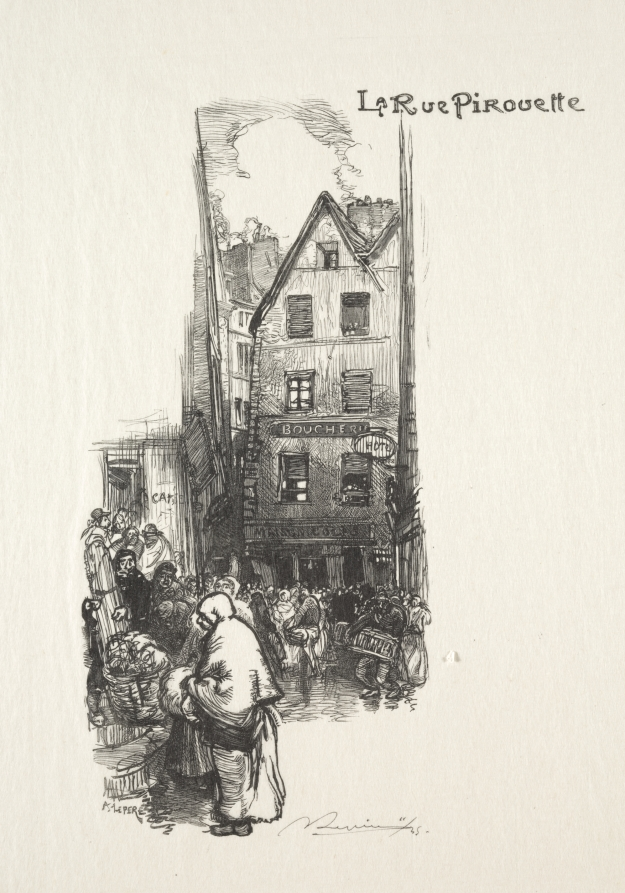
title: La Rue Pirouette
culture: France, 19th-20th century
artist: Auguste Louis Lepère (French, 1849–1918)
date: 1896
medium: wood engraving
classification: Print